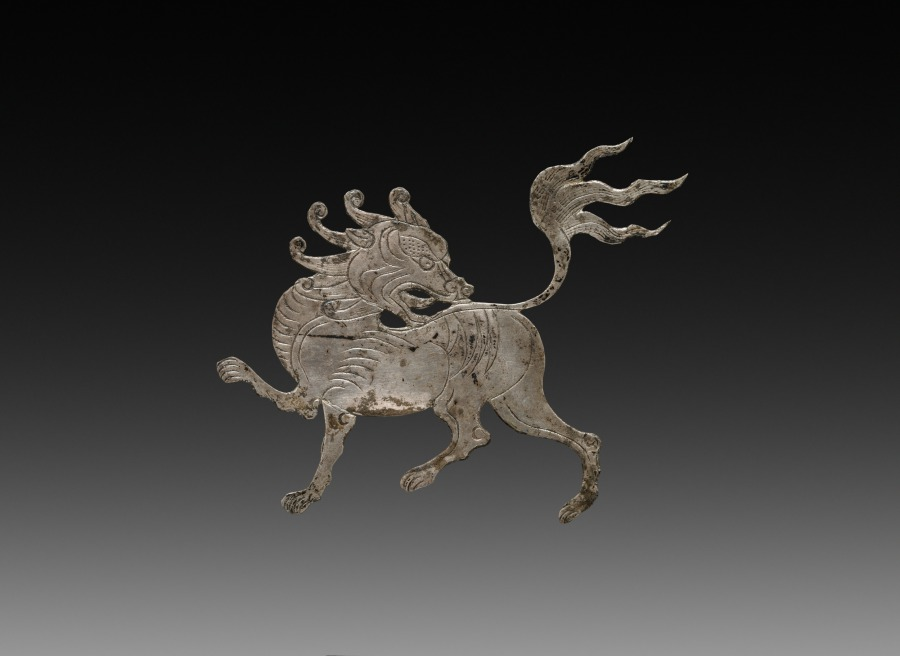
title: Inlay for a Mirror or Box: shih-shih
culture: China, Tang dynasty (618-907) - Song dynasty (960-1279)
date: c. 900–1000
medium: beaten silver with chased details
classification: Metalwork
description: The p'ing-t'o technique of inlaying gold and silver foil on lacquer produced luxurious articles of elegance and fragility. These stray silver inlays were originally mounted on a mirror back or a cosmetic box whose lacquered surface has disintegrated. They combine auspicious symbols of Indian and Chinese origin--human-headed birds whose melodies filled the Buddhist paradise, and bird-riding deities who inhabited the skies of Taoist mythology. Like these imaginary beings, the lions were probably paired in a radial design; at least one has been lost.